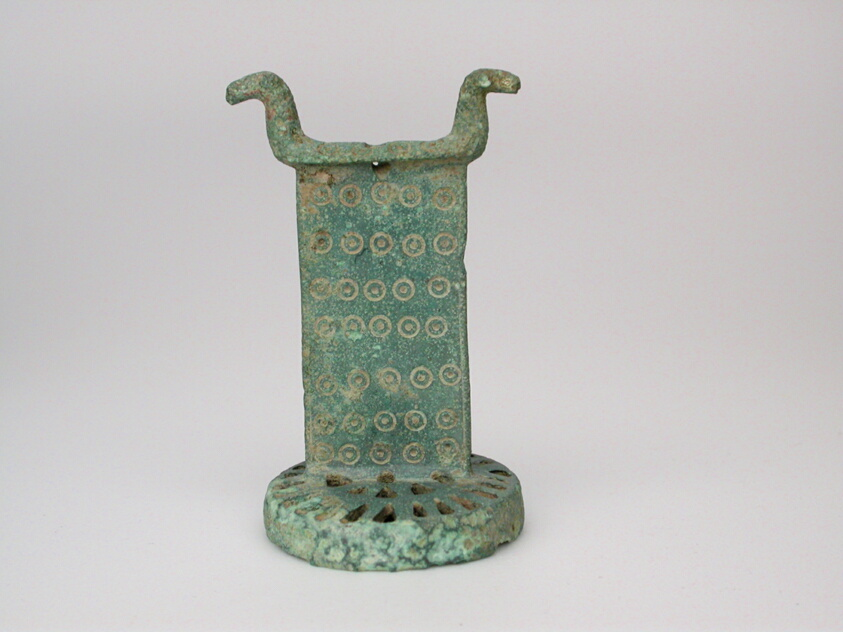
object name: Sculpture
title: Altar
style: geometric, ancient, greek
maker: Greek; Thessaly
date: Geometric Period (800–600 BCE)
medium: Bronze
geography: Greece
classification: votive offering; ex-voto; sculpture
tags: altar